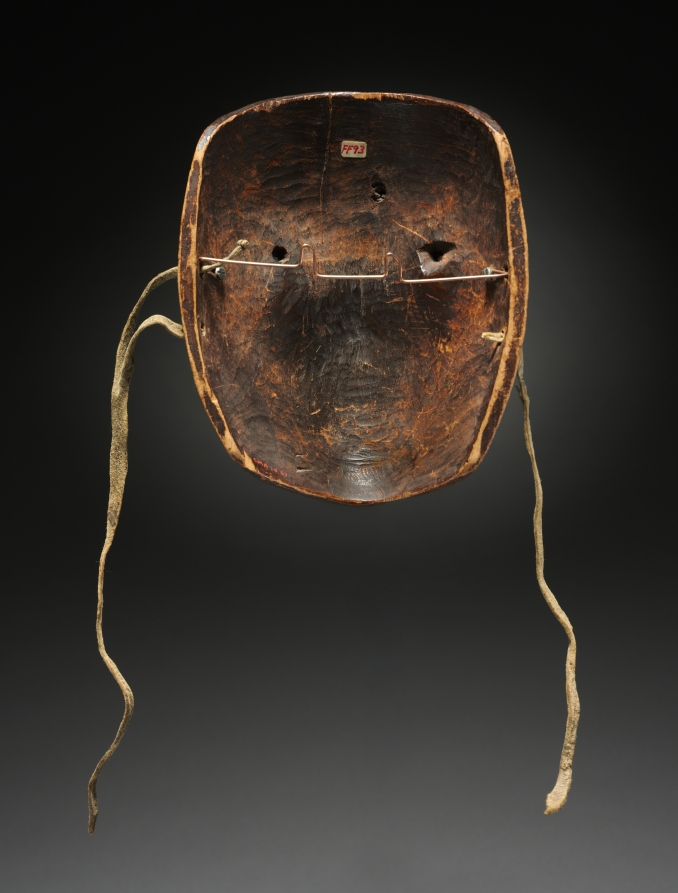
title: Mask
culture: Native North America, Northwest Coast, Alaska, Tlingit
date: late 1800s–early 1900s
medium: wood (alder), pigment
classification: Sculpture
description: In 1998, Robert Joseph, a Northwest Coast chief, recalled that when he donned ceremonial dance masks as a youth, "all the world is somewhere else . . . I am the mask . . . the bird . . . the animal . . . the spirit. I transcend into the being of the mask." Although this mask's identity is lost, it may represent a mythic ancestor of a Tlingit family and perhaps was worn during a winter ceremony.